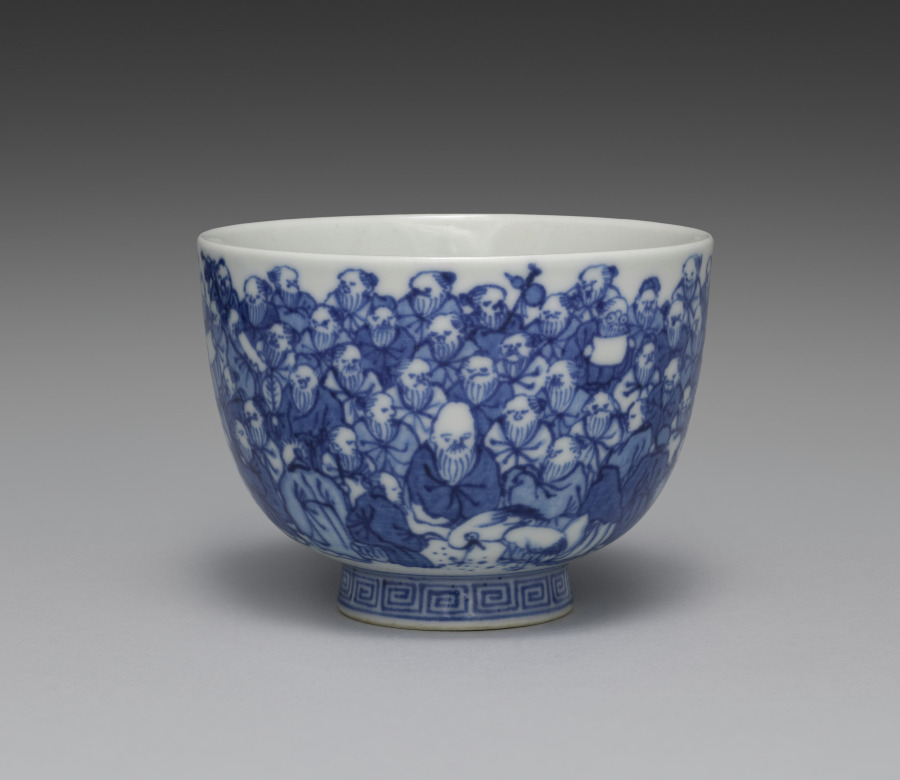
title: Teacup from Teacups with a Hundred Sages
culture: Japan, Meiji period (1868–1912)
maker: Seifū Yohei III (Japanese, 1851–1914)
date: 1893–1914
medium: One from a set of five teacups; porcelain with underglaze blue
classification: Ceramic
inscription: 清風造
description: Each of these five teacups has a painting of identical design in underglaze blue, but as the tiny figures are drawn entirely by hand, each cup has its own personality. The theme of the sencha cups is an assembly of sages or immortals, literally “a hundred venerable [people]” (hyakurō). The myriad figures crowd the scene in groups. The god of longevity, with his tall forehead, sits with his cranes, having flown in from Mt. Penglai on the Isle of the Immortals. Seven long-bearded sages sit around a stone table, chatting and drinking; one is seated on an enormous gourd. Of course, there is a stack of books on the table, and elsewhere, scrolls are being written upon or read—in one case held very close by a sage who is wearing glasses. The design was enormously popular in ceramics made for those engaged in literati culture.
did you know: Seifū Yohei III (1851–1914) produced many works for tea gatherings where people drank Chinese-style leaf-tea (sencha).